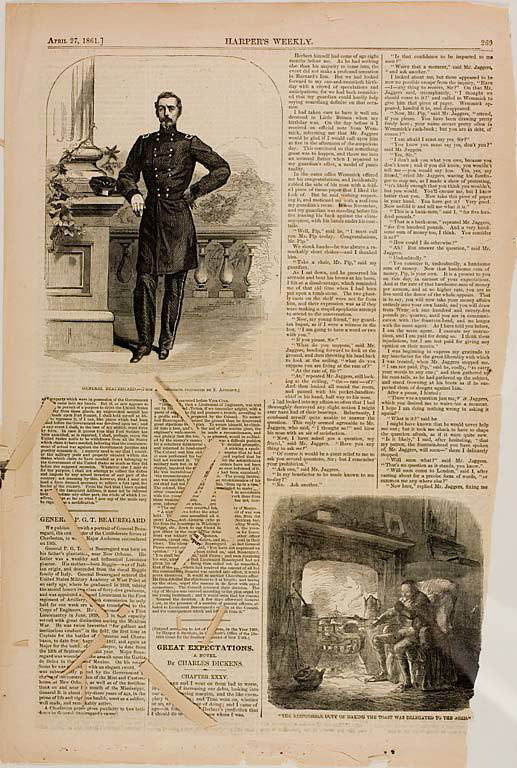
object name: Print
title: General Beauregard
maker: Winslow Homer (American, 1836-1910); after E. D. Anthony (American, 1818-1888); published by Harper's Weekly (American, 1857-1916)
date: published April 27, 1861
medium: Wood engraving on paper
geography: United States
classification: wood engraving; print; prints and drawing